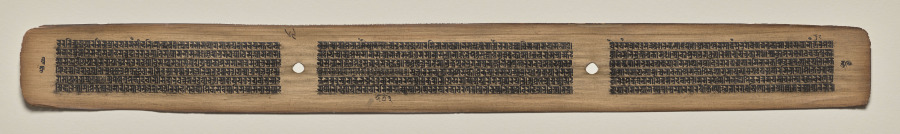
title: Text, Folio 69 (verso), from a Manuscript of the Perfection of Wisdom in Eight Thousand Lines (Ashtasahasrika Prajnaparamita-sutra)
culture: Eastern India, Bihar, Vikramashila Monastery. Painting: Nepal, Kathmandu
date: Sunday, September 14, 1119 (year 239 of the Newar Samvat in the month of Ashvina)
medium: gum tempera and ink on palm leaves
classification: Painting